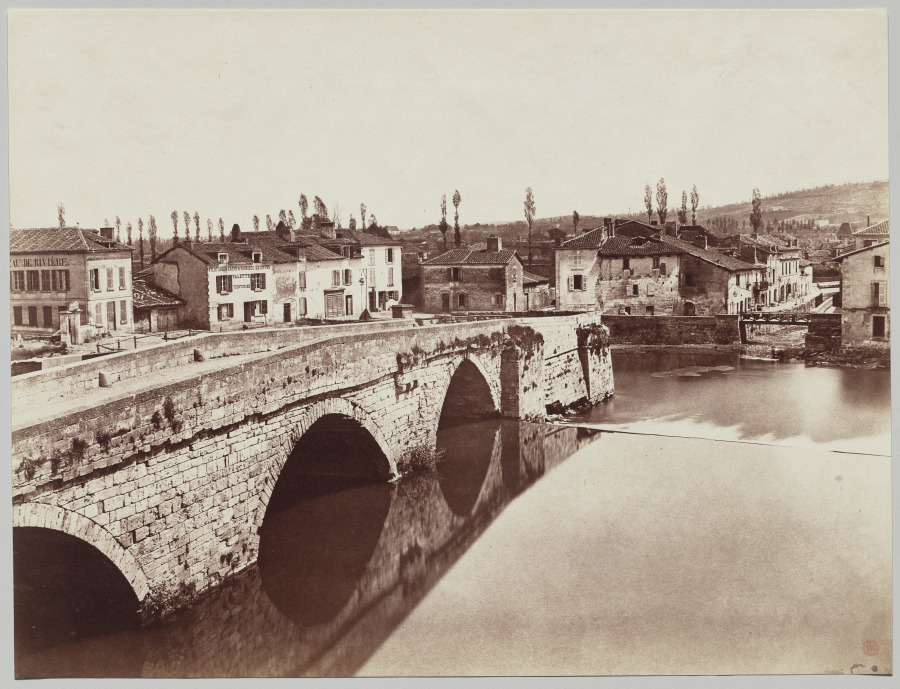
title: Périgueux. The Tournepiche Bridge, upstream side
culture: France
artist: Édouard Baldus (French, 1813–1889)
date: 1860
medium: albumenized salt print from a paper negative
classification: Photograph